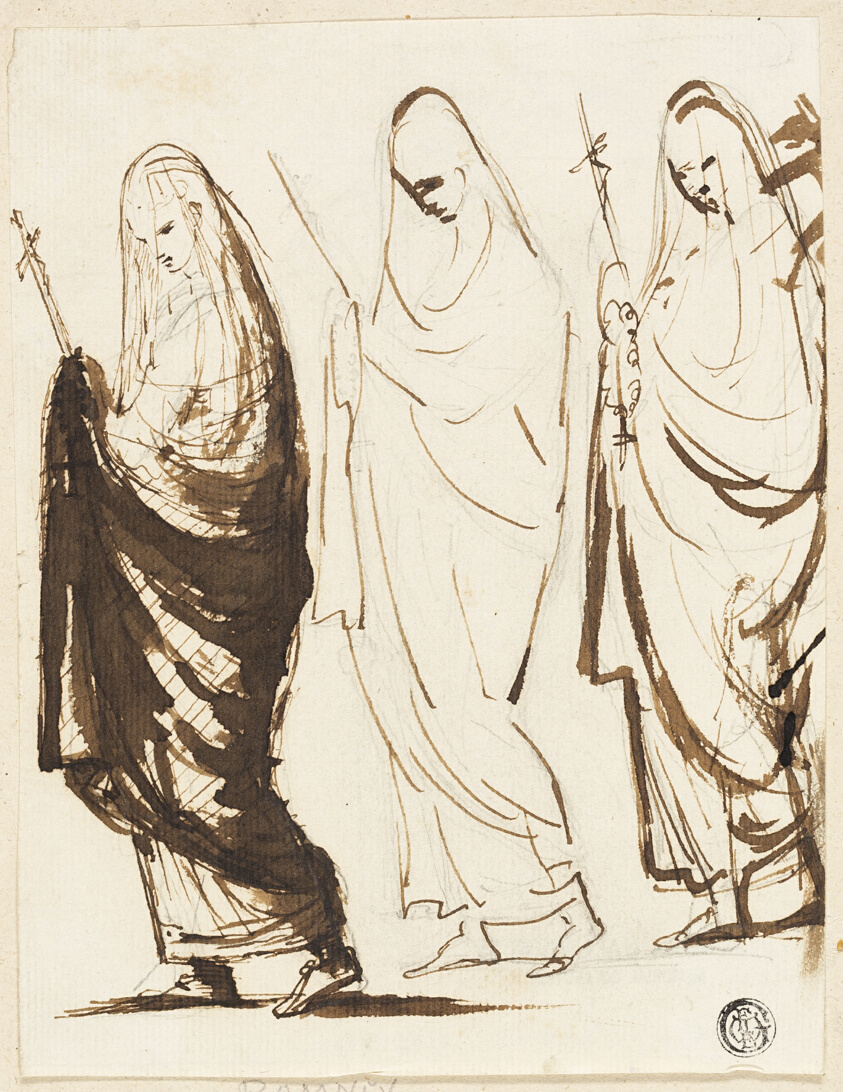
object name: Drawing and Watercolor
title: Procession of Three Draped Women Holding Crosses or Sceptres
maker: Attributed to George Romney; English, 1734-1802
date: 1754/1802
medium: Pen and brown ink, with brush and brown ink, over graphite, on ivory laid paper, tipped onto tan wove paper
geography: England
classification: pen and ink drawings; drawings (visual works); prints and drawing